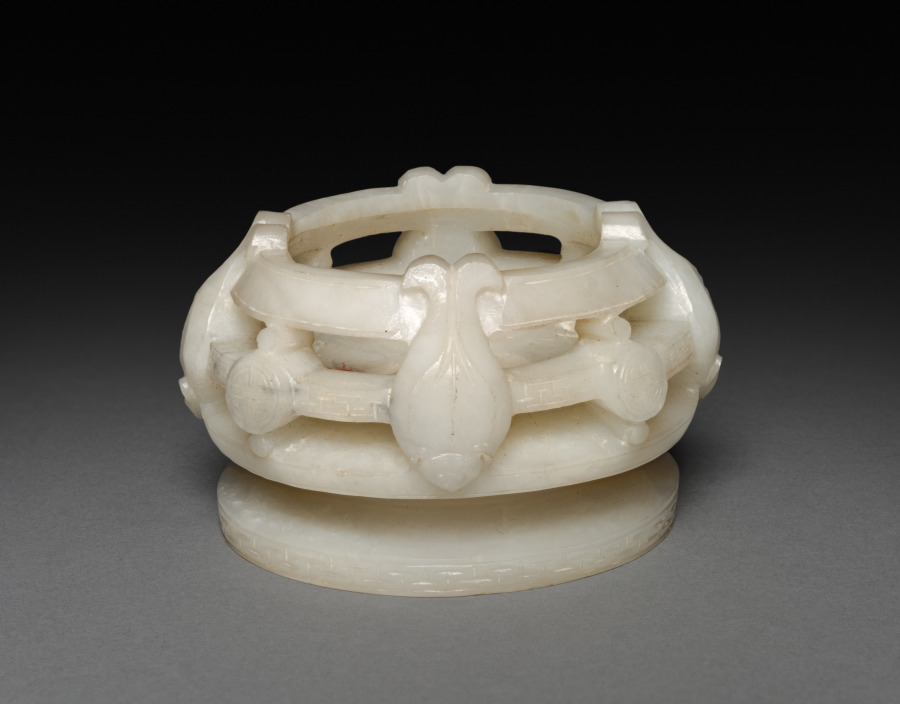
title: Three-Sectional Altar Group: Small Bowl with Carved Dragon (bottom section of base)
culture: China, Qing dynasty (1644-1911)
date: 1644–1911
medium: jade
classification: Jade